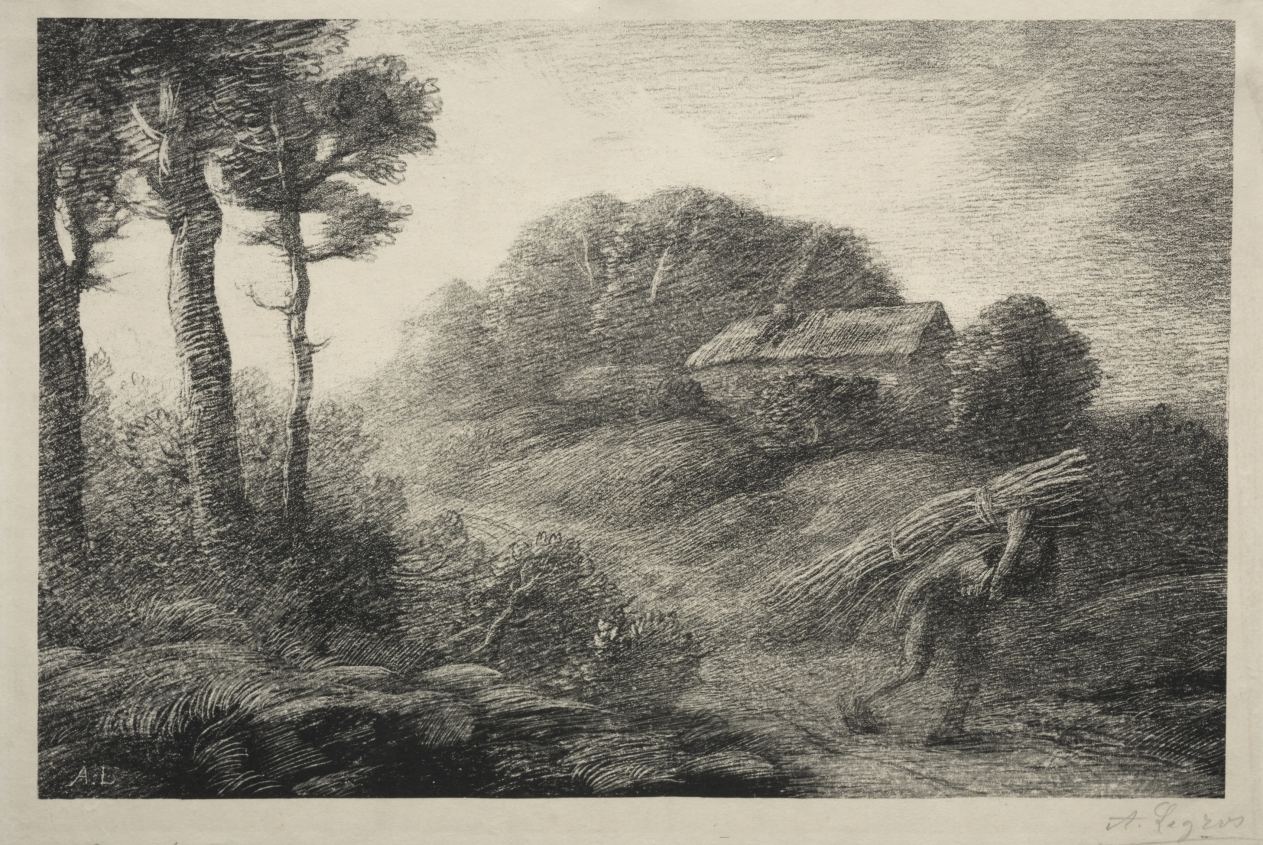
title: The Return of the Fagot Gatherer (2nd state)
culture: France, 19th-20th century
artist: Alphonse Legros (French, 1837–1911)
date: c. 1857–1911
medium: lithograph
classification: Print